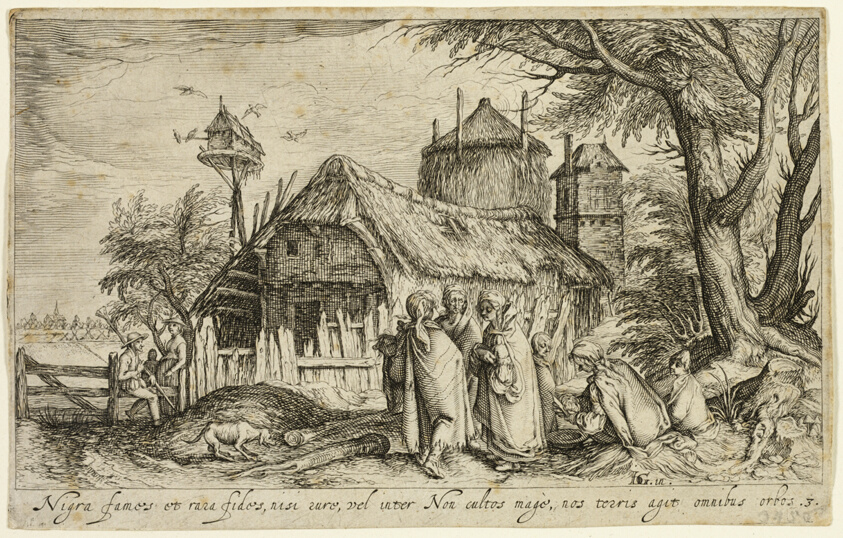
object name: Print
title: Landscape with Gypsy Women Near a Farm Building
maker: Andries Stock (Dutch, c. 1580-after 1648); after Jacques de Gheyn II (Dutch, 1565-1629)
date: c. 1610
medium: Engraving and etching on ivory paper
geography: Netherlands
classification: etching; print; prints and drawing